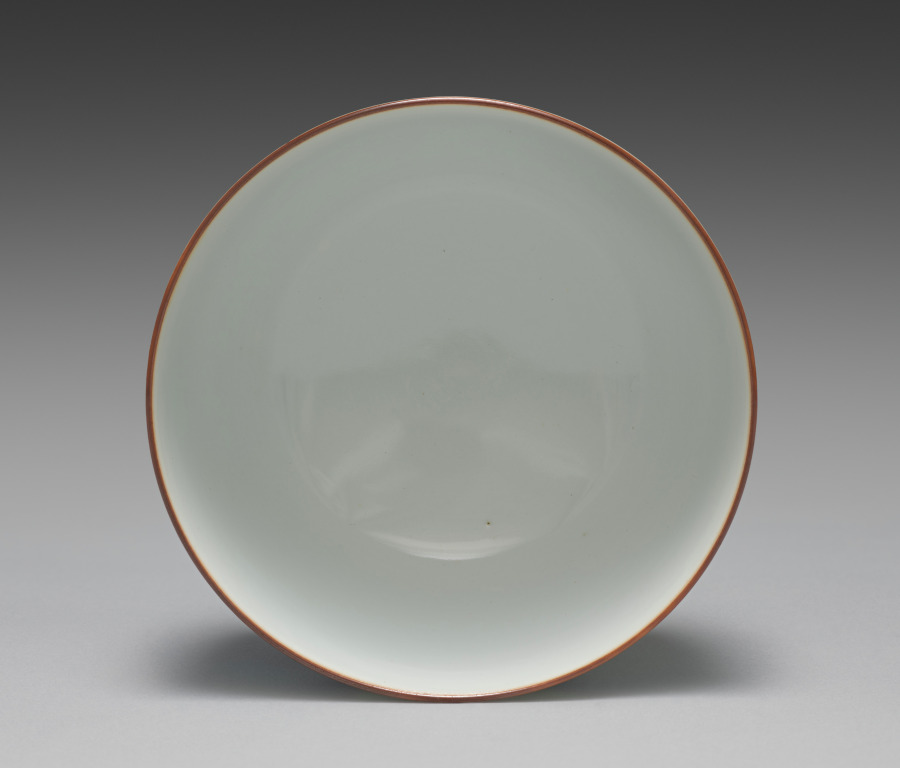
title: Bowl with Chinese Landscape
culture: Japan, Meiji period (1868–1912)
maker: Seifū Yohei III (Japanese, 1851–1914)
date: 1893–1914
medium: porcelain with underglaze blue and overglaze red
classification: Ceramic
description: This bowl has a landscape with figures in blue and iron oxide. The scene is set along a river with mountains in the distance, likely in the Jiangnan region of southern China, famous for compositions of the Eight Views of the Xiao and Xiang Rivers and of West Lake in Hangzhou. There are two people in the foreground: one person fishes along the riverbank across from a rustic hermit’s lodge sited on stilts over the water’s edge; on the other side of the bowl, a person with a tall staff gazes at the full moon, accompanied by his servant. The foot has a double band in blue, while another blue band encircles the bowl just beneath the rim, which is covered in red iron oxide. The inside of the footring is also circled in blue around the impressed mark.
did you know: The flock of geese making its way across the sky and the many bare tree branches suggest the season may be autumn.